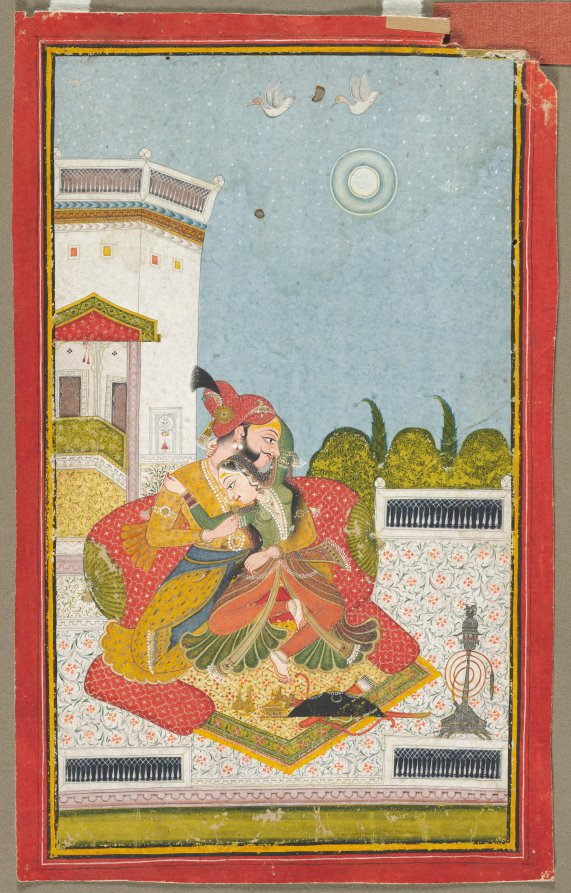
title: Lovers Embracing (Raga Malkaus)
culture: India, Rajasthan, Bundi, 18th century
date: c. 1760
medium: Gum tempera, ink, and gold on paper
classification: Painting